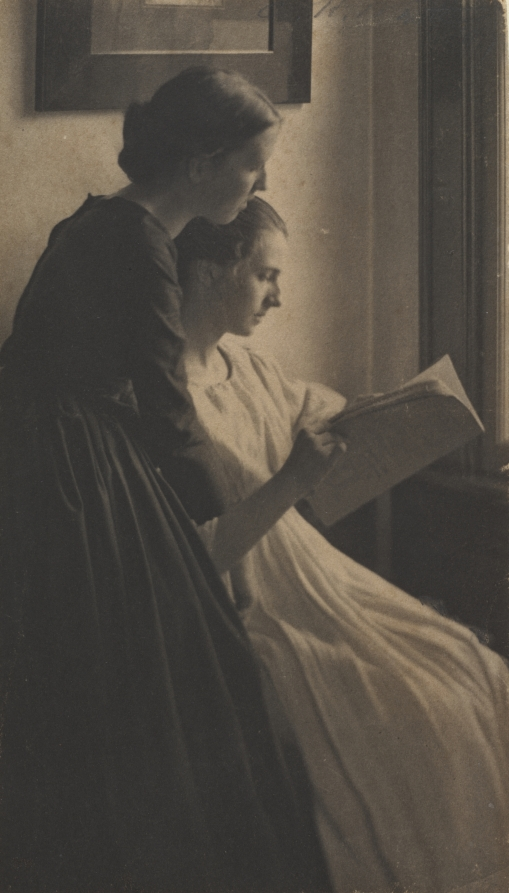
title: The Readers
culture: America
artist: Clarence H. White (American, 1871–1925)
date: 1897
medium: platinum print with graphite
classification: Photograph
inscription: Written in pencil on recto of photo: "Clarence H. White [signed] '99(?)"; in pencil on verso: "Letty Felix (left) / Julia McCune (right) / Taken by Clarence / White about 1898"